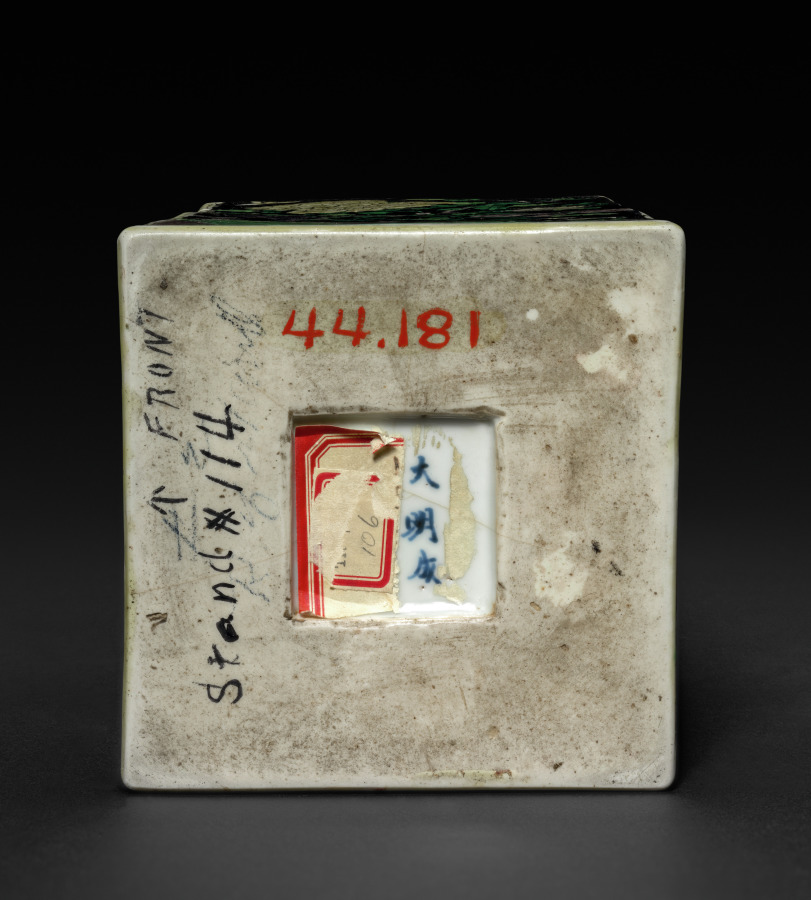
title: Club-shaped Vase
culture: China, Qing dynasty (1644-1911), Kangxi reign (1662-1722)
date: 1662–1722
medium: porcelain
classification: Ceramic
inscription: 大明成...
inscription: [arrow] FRONT/Stand #114